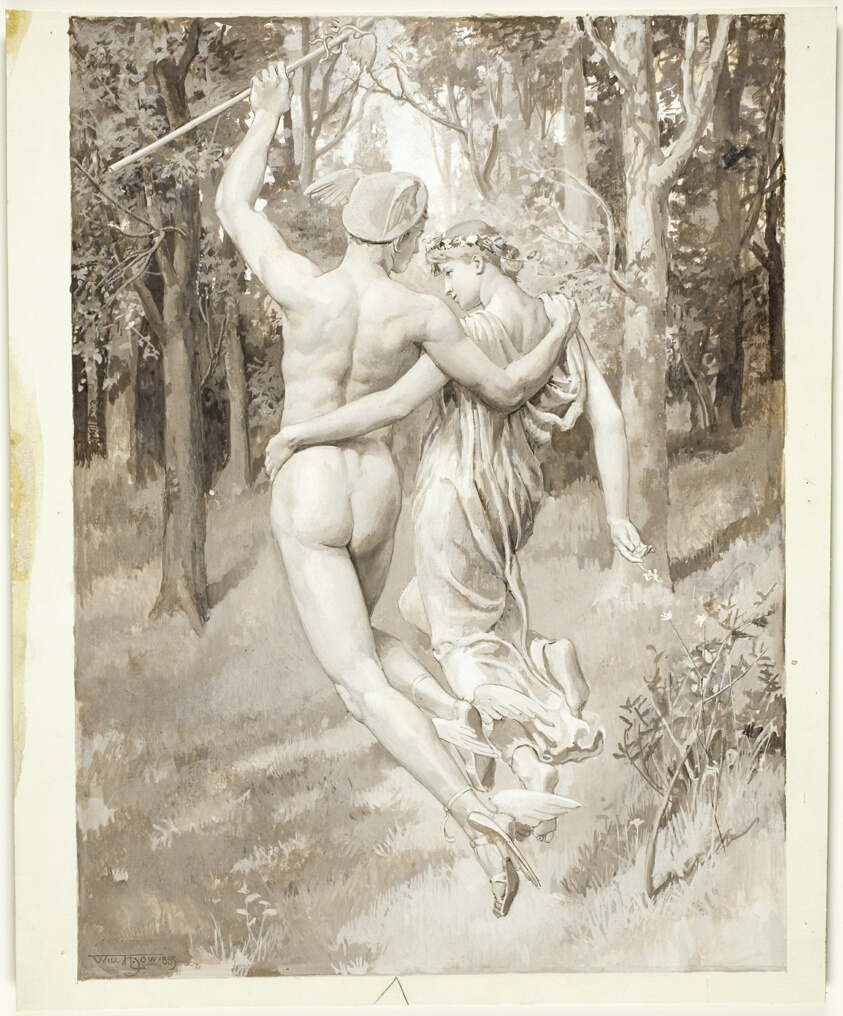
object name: Drawing and Watercolor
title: Into the Green Recessed Woods They Flew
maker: Will Hicock Low (American, 1853-1932)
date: 1885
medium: Brown and white gouache, with touches of black gouache, on cream wood-pulp laminate board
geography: United States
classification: drawings (visual works); prints and drawing